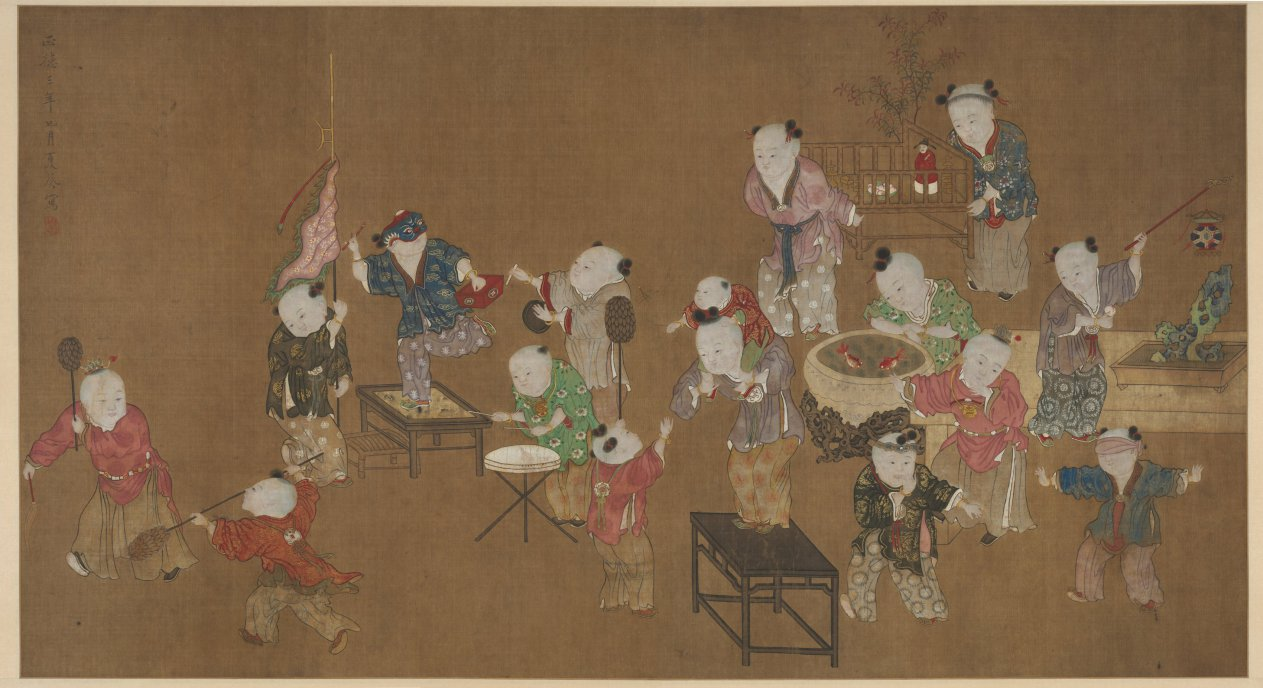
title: Children at Play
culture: China, Ming dynasty (1368–1644)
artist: Xia Kui (Chinese, active c. 1405–1445)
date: 1508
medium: hanging scroll; ink and color on silk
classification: Painting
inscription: 正德三年七月夏葵寫 [Zhengde san nian qi yue Xia Kui xie]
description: Sixteen children engage in scholarly, religious, and military activities, representing the popular “one hundred boys” theme expressing the wish for abundant, successful male offspring. Such paintings conveying auspicious wishes were often displayed during the New Year festival season. Two older boys wear small crowns with red tassels. Another child with a mask holds a brush in one hand, a rice measure in the other. He stands on a low table imitating Kuixing, the God of Examinations and servant to the God of Literature.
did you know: In the foreground on the right are three boys playing a kind of blind man’s bluff.